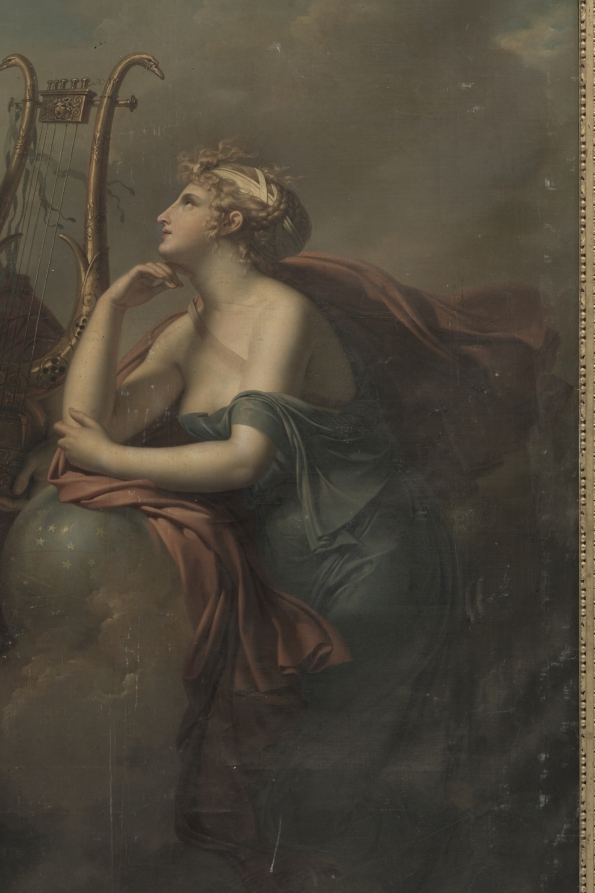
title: Apollo, God of Light, Eloquence, Poetry, and the Fine Arts with Urania, Muse of Astronomy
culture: France, late 18th century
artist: Charles Meynier (French, 1768–1832)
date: 1798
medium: oil on canvas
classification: Painting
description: A recipient of the Grand Prix de Rome in 1789, Charles Meynier became a member of the Académie des Beaux-Arts in 1815 and painted large ceiling decorations at the Louvre and numerous pictures glorifying the Napoleonic legend. Erato, Muse of Lyrical Poetry belongs to a cycle of five paintings executed to fulfill a commission from businessman François Boyer-Fonfréde. They were intended to decorate his home in his native Toulouse and constitute a rare instance of a complete cycle of major paintings that remain intact rather than being split up and separately dispersed.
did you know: Urania leans on a starry orb, indicating her role as the muse of astronomy.